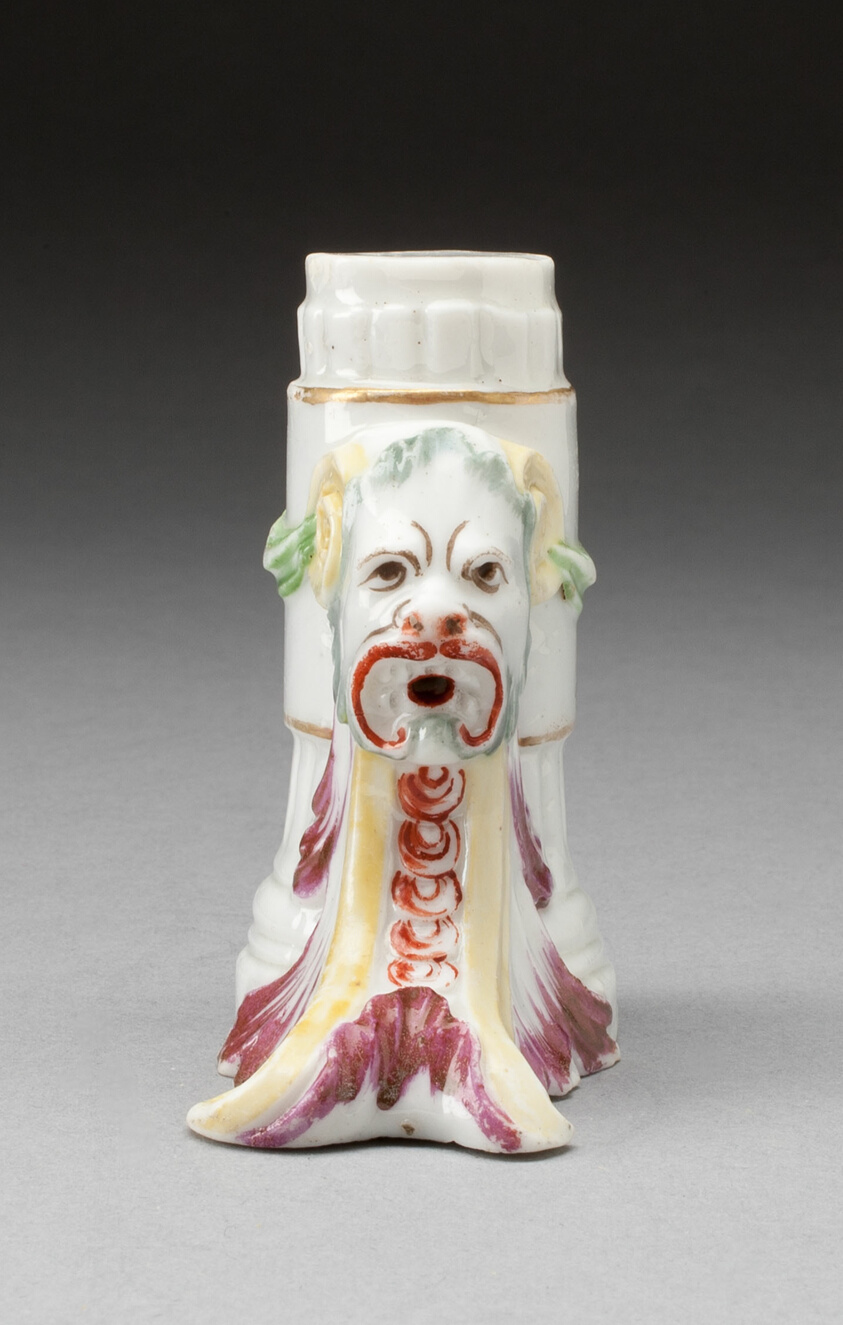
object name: Ceramics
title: Pedestal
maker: Italy, Venice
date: c. 1770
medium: Porcelain with polychrome enamels and gilding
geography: Venice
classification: porcelain; european decorative arts; ceramics